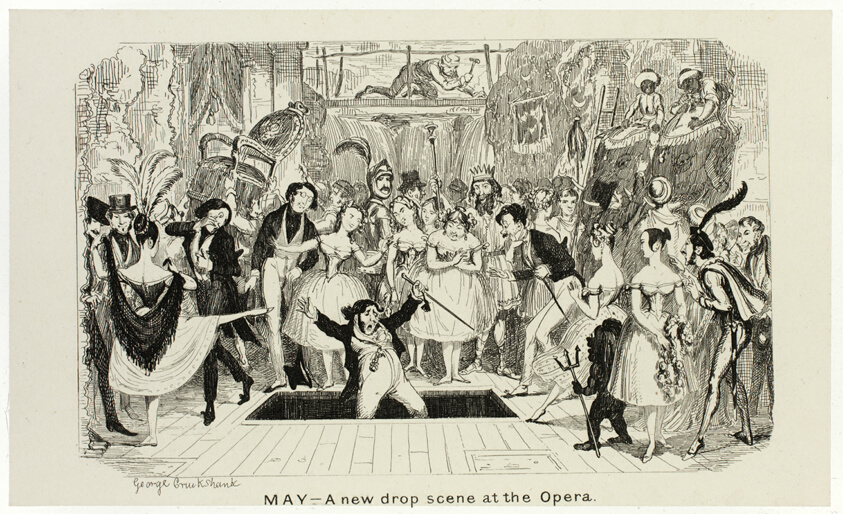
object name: Print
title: May - A New Drop Scene at the Opera from George Cruikshank's Steel Etchings to The Comic Almanacks: 1835-1853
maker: George Cruikshank (English, 1792-1878); published by Pickering & Chatto (English, 19th century)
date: 1840, printed c. 1880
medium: Steel etching in black on cream India paper, laid down on off-white card (chine collé)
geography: England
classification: etching; paper; steel; print; prints and drawing